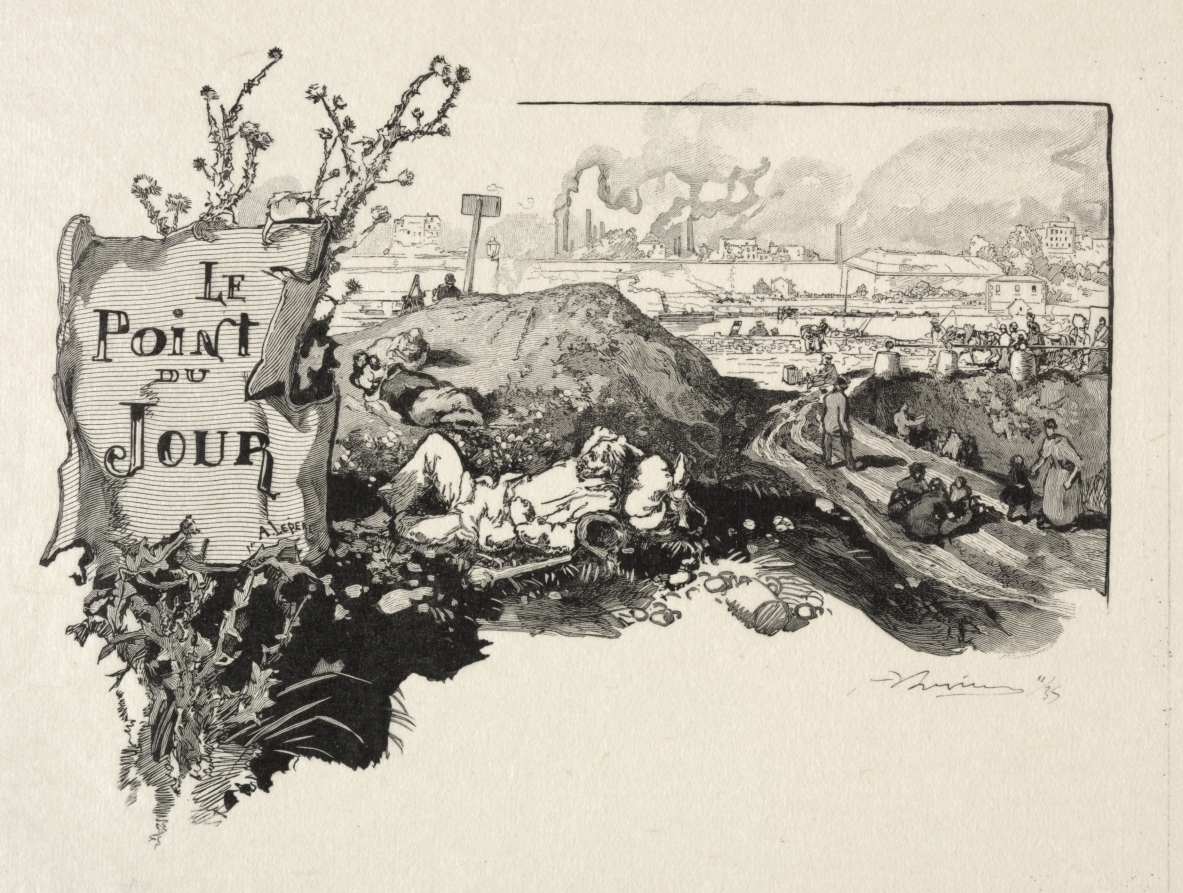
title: Le Point du Jour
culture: France, 19th-20th century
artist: Auguste Louis Lepère (French, 1849–1918)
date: 1890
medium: wood engraving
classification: Print